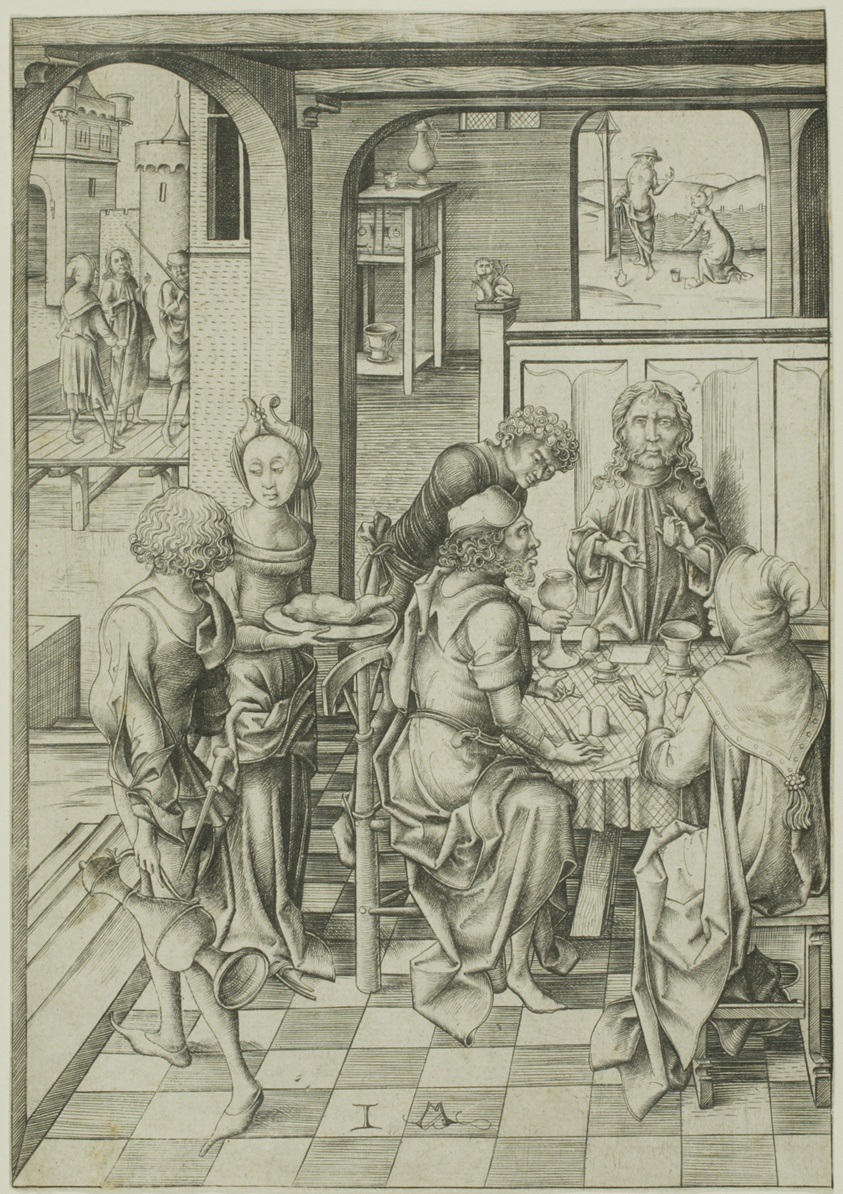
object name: Print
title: Christ at Emmaus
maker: Israhel van Meckenem the Younger; German, c. 1440/45-1503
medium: Engraving on ivory laid paper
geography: Germany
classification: engraving; print; prints and drawing